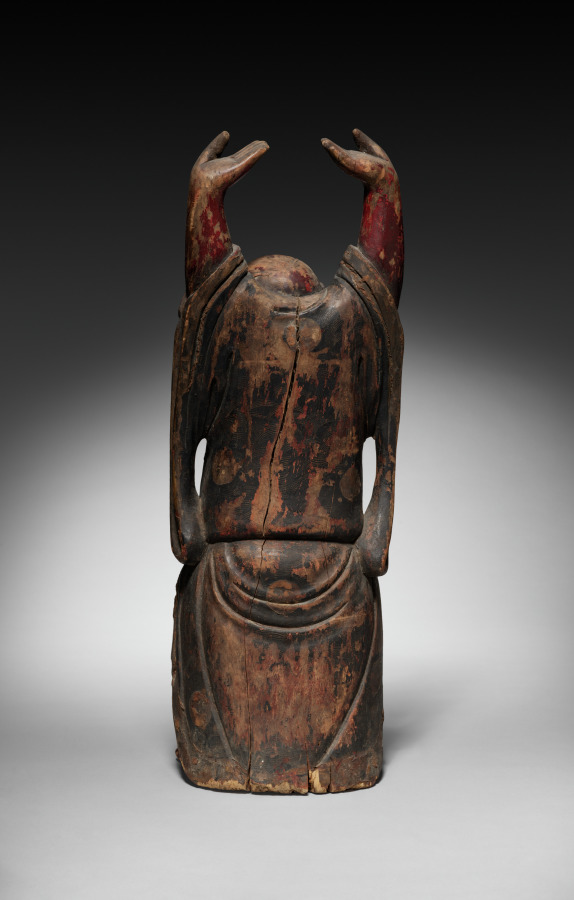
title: The Monk Budai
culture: China, Ming dynasty (1368–1644)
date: 1400s–1500s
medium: wood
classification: Sculpture